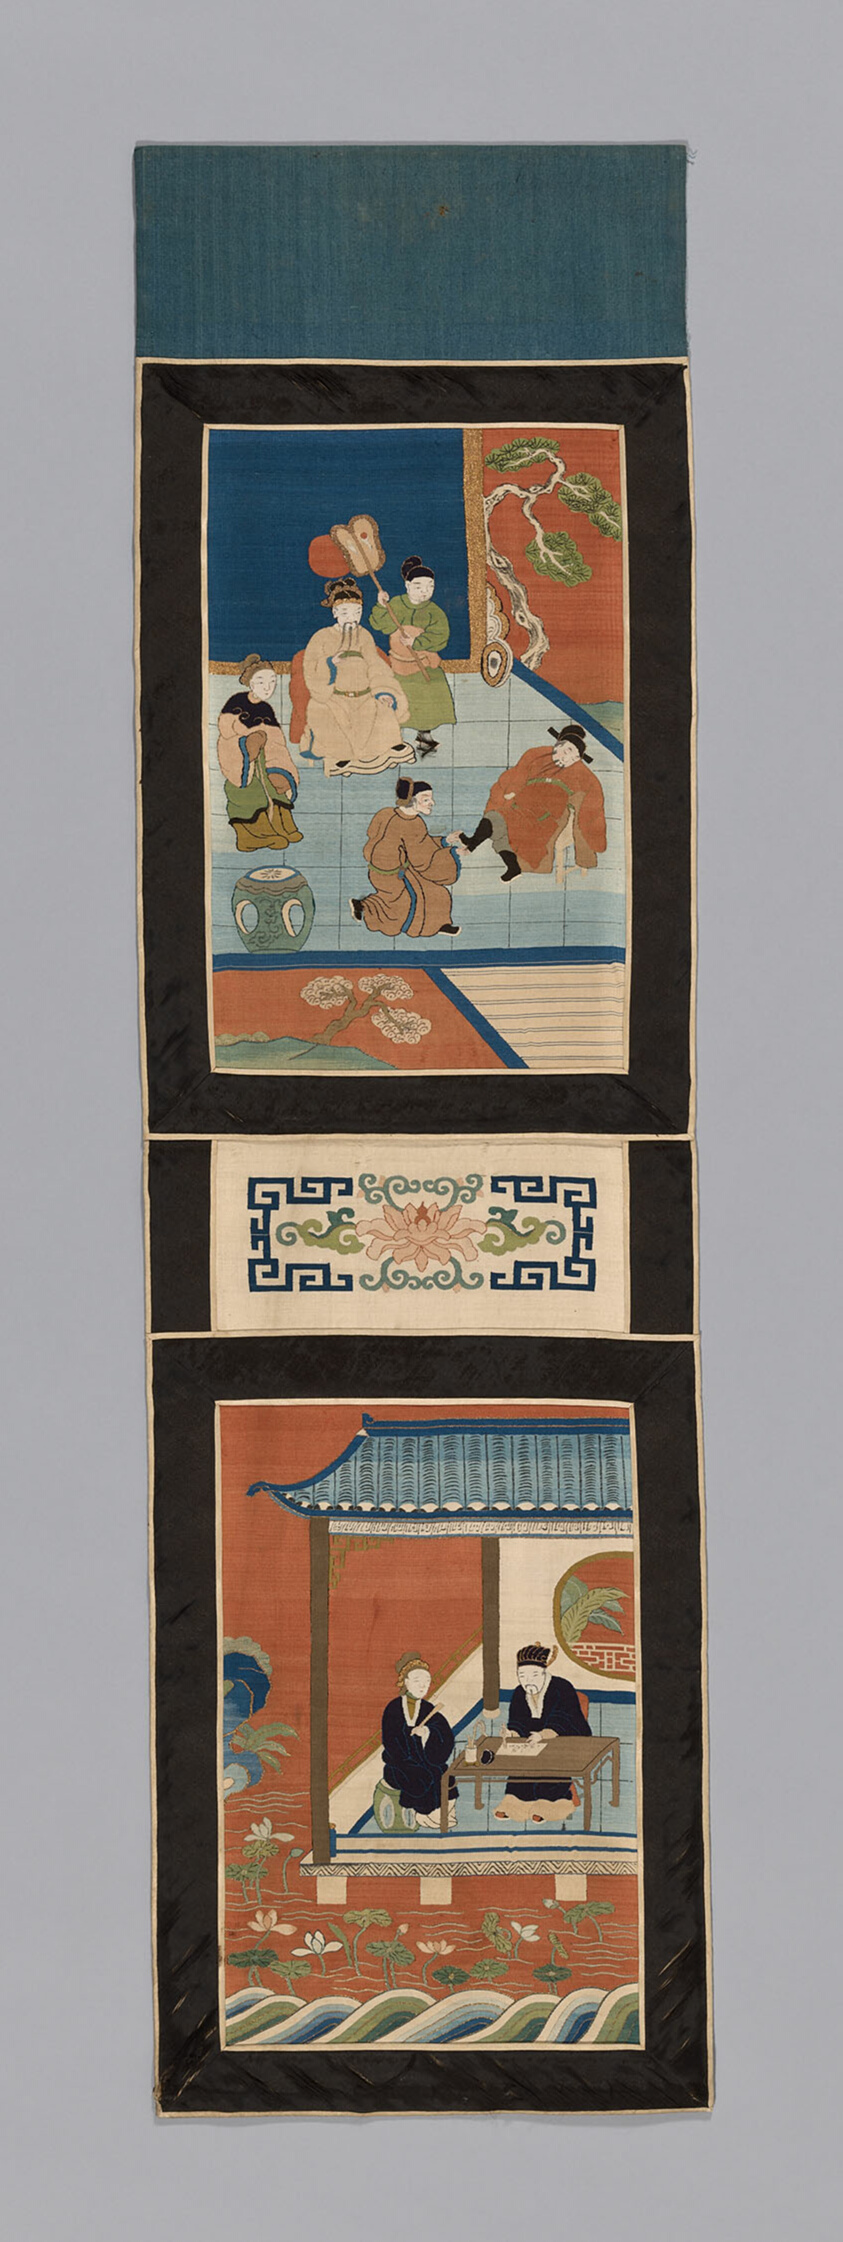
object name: Textile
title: Panel (For a Screen)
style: qing, Chinese (culture or style), East Asian, asian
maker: China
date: Qing dynasty (1644–1911), 1875/1900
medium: Panels: Silk, gold-leaf-over-lacquered-paper-wrapped silk, slit tapestry weave with extended weft and interlaced outlining wefts; painted; borders: silk and cotton, warp-float faced 5:1 satin weave; inner and outer edges: silk, warp-float faced 4:1 satin weave; lining: cotton, plain weave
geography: China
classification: weaving - tapestry; weaving; textile